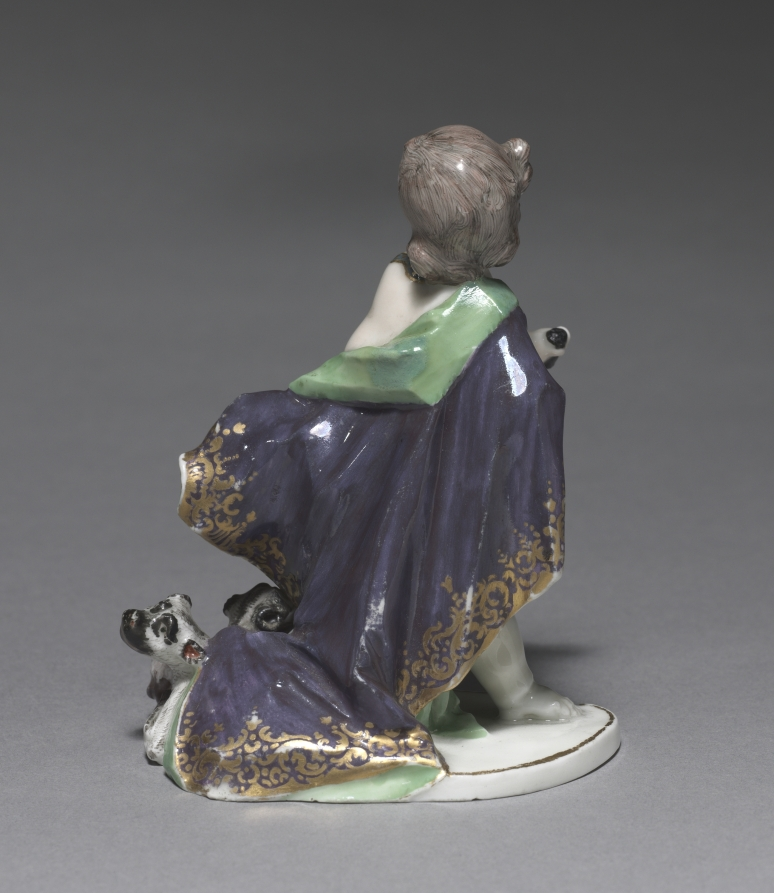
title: Pluto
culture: Germany, Nymphenburg, 18th century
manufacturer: Nymphenburg Porcelain Factory (German, founded 1747)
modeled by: Franz Anton Bustelli (Swiss, 1723–1763)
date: c. 1760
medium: porcelain with enamel and gilt decoration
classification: Ceramic